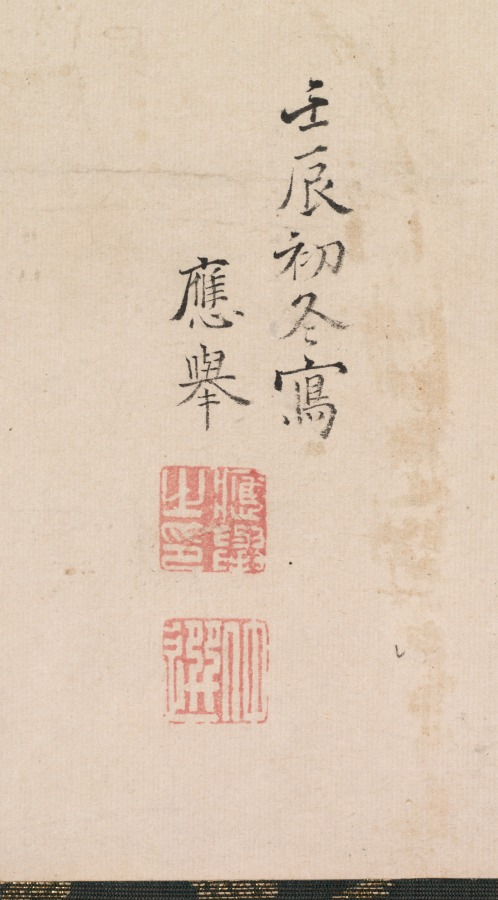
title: Tiger in Wind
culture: Japan, Edo period (1615–1868) to Meiji period (1868–1912)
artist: after Maruyama Ōkyo (Japanese, 1733–1795)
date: 1800s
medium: hanging scroll; ink on paper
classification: Painting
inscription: 「秋空一鶴」賛 長嘯一聲風括地「月渚」朱文方印「祐常之章」白文方印 壬辰初冬寫応挙 「應舉之印」白文方印・「仲選」白文方印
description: The seals appended to the inscription on this painting suggest that the text was brushed by Yūjō (1723–1773), an imperial prince who became a Buddhist monk and was abbot of Enman'in at Miidera. The line is from a poem attributed to a Yuan dynasty poet, Yu Ruyu (dates unknown), and describes the sound of a fierce wind lashing the ground. Wind is associated with the roar of the tiger. Yūjō was Maruyama Ōkyo's most important patron as a young artist, and this painting has a signature asserting that Ōkyo created it in 1772, the year before Yūjō's death. While Yūjō produced a preface for a now famous set of handscrolls he commissioned Ōkyo to paint, and a number of Ōkyo's compositions for Enman'in survive, this work would appear to be one imagining their relationship, as opposed to a genuine piece.